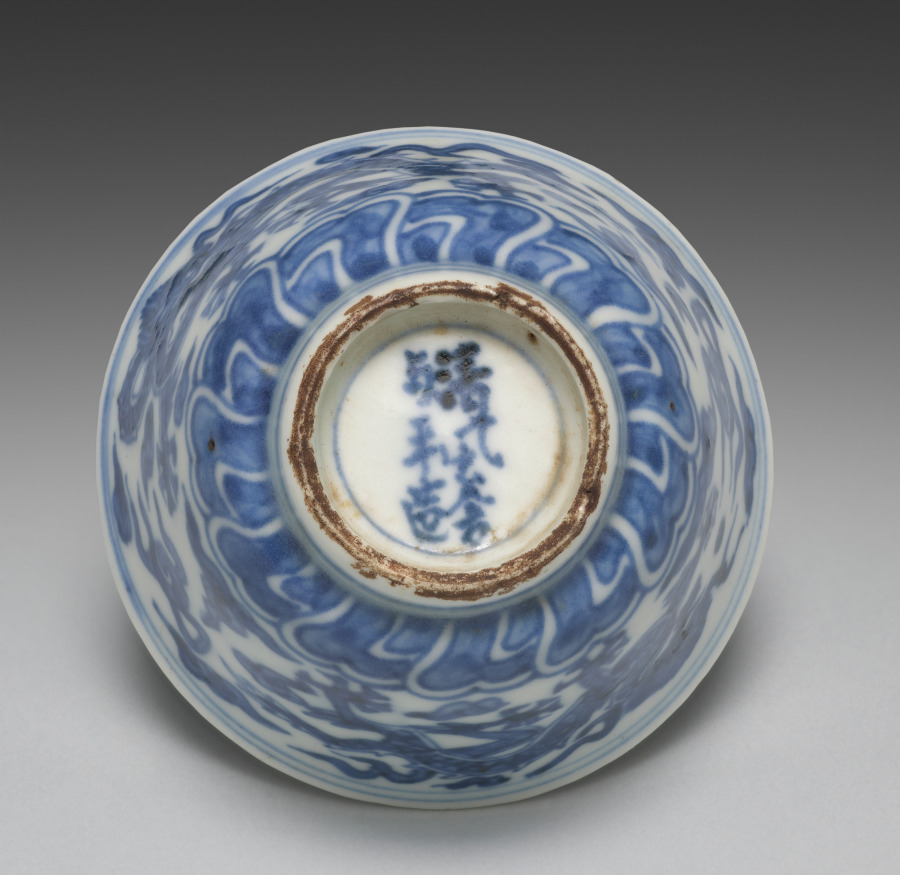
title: Cup from Tea Cups with Dragons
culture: Japan, Edo period (1615–1868)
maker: Seifū Yohei I (Japanese, 1801–1861)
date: 1840s–57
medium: One from a set of five tea cups; porcelain with underglaze blue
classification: Ceramic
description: Seifū Yohei I made both blue and white porcelains after Ming dynasty (1368–1644) Chinese wares fired in the kilns at Jingdezhen for export. He also made colorful stoneware in the style of his teacher, Nin’ami Dōhachi (Takahashi Dōhachi II) (1783–1855).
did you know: A small figure of an elephant serves as the handle for the lid.